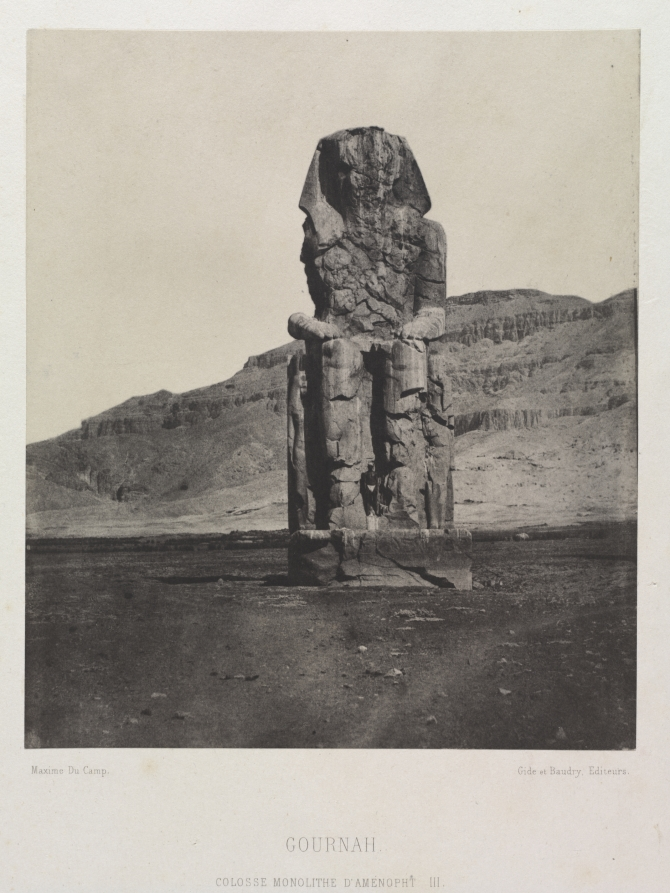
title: Colossol Monolith of Amenhotep III, Gournah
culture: France, 19th century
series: Égypte, Nubie, Palestine et Syrie. Dessins photographiques receuillis pendant les années 1849, 1850 et 1851 accompagnes d'un text explicatif et précédés d'une introduction par Maxime Du Camp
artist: Maxime Du Camp (French, 1822–1894)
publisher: Gide et J. Baudry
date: 1849–51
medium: salted paper print from calotype negative, Blanquart-Évrard process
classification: Photograph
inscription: Printed on verso of mount: "Thèbes / Maxime Du Camp, Gide et Baudry, Editeurs / Gournah, / Colosse Monolithe d'Aménopht III, / Imprimerie Photographique de Blanquart-Évrard, à Lille / Pl. 56"